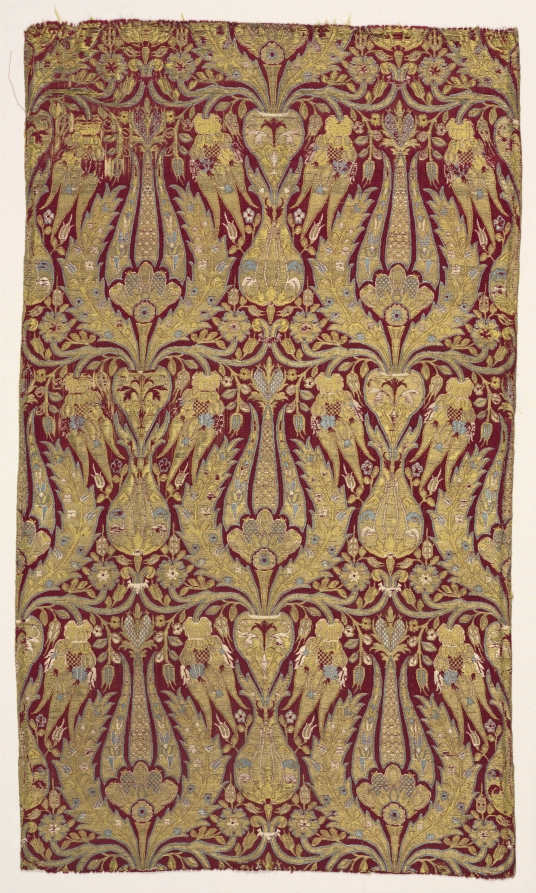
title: Fragment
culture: Italy, 16th century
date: 16th century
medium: Silk brocade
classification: Textile